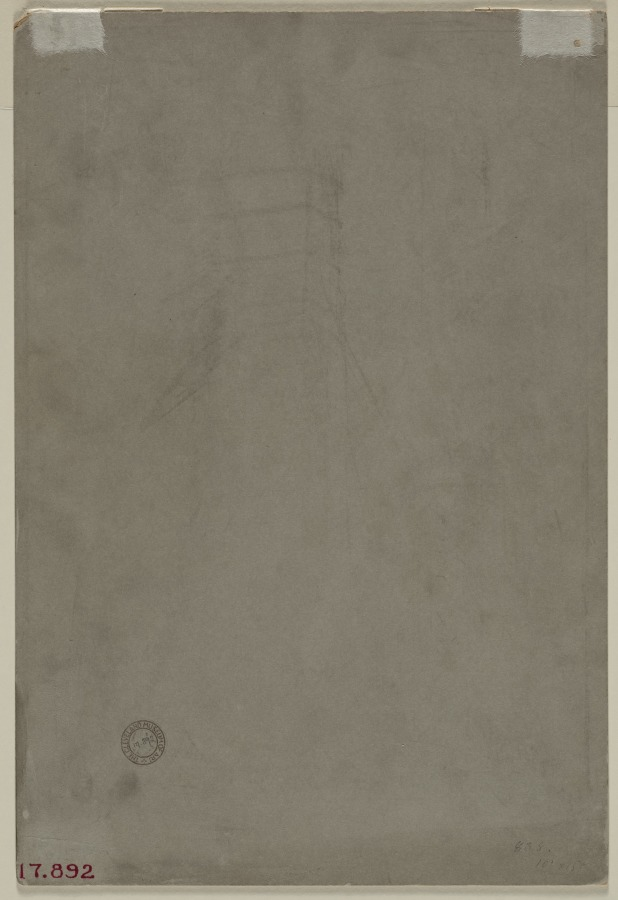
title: Five Studies of a Soldier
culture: America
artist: Carl Marr (American, 1858–1936)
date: fourth quarter 19th century or first third 20th century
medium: graphite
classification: Drawing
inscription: [signed ?], lower left, in graphite: Professor / Carl Marr- / Munich- ; VERSO OF SECONDARY SUPPORT, lower right, in graphite: 838. / 10 2[superscript] x 15 2[superscript]